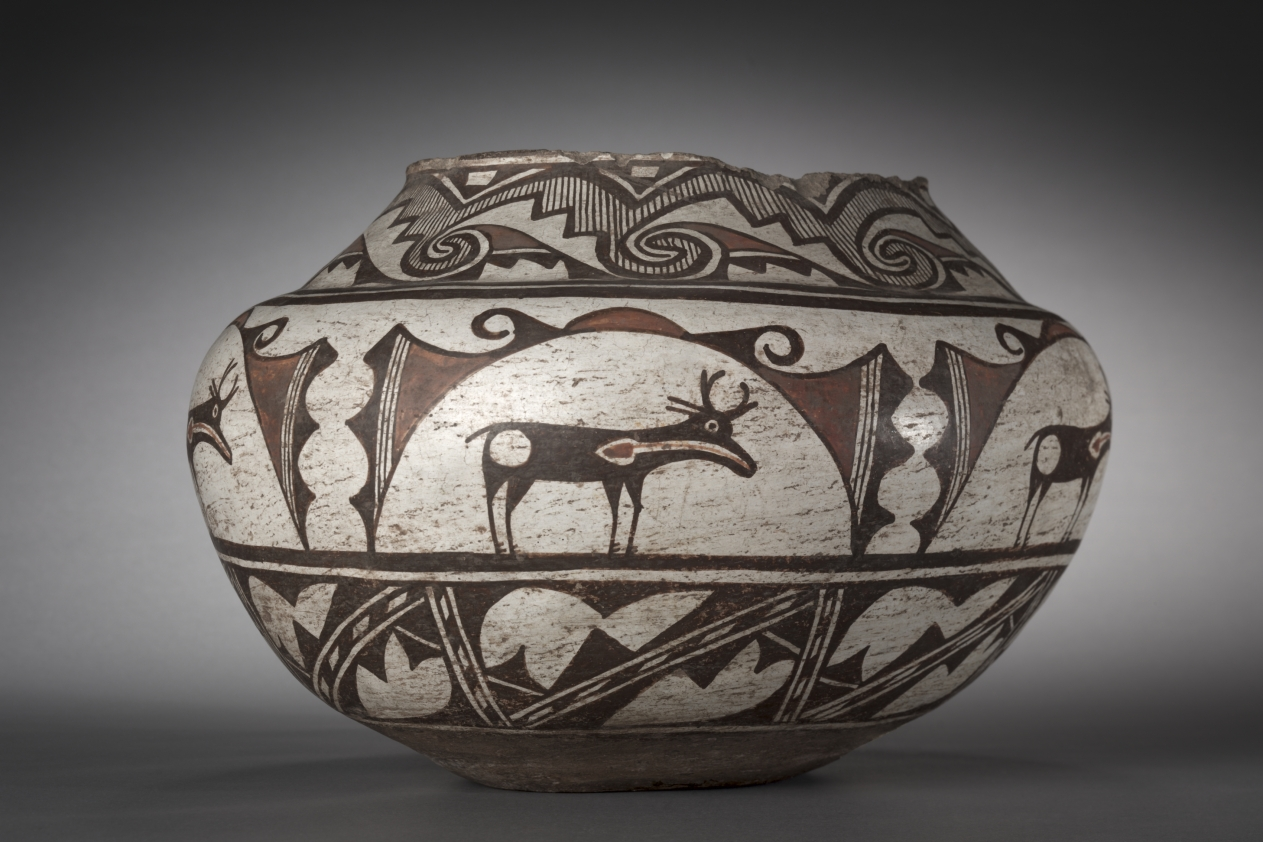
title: Water Jar (Olla)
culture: Southwest, Pueblo, Zuni, Post-Contact, 19th century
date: 1870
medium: slip-painted ceramic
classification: Ceramic